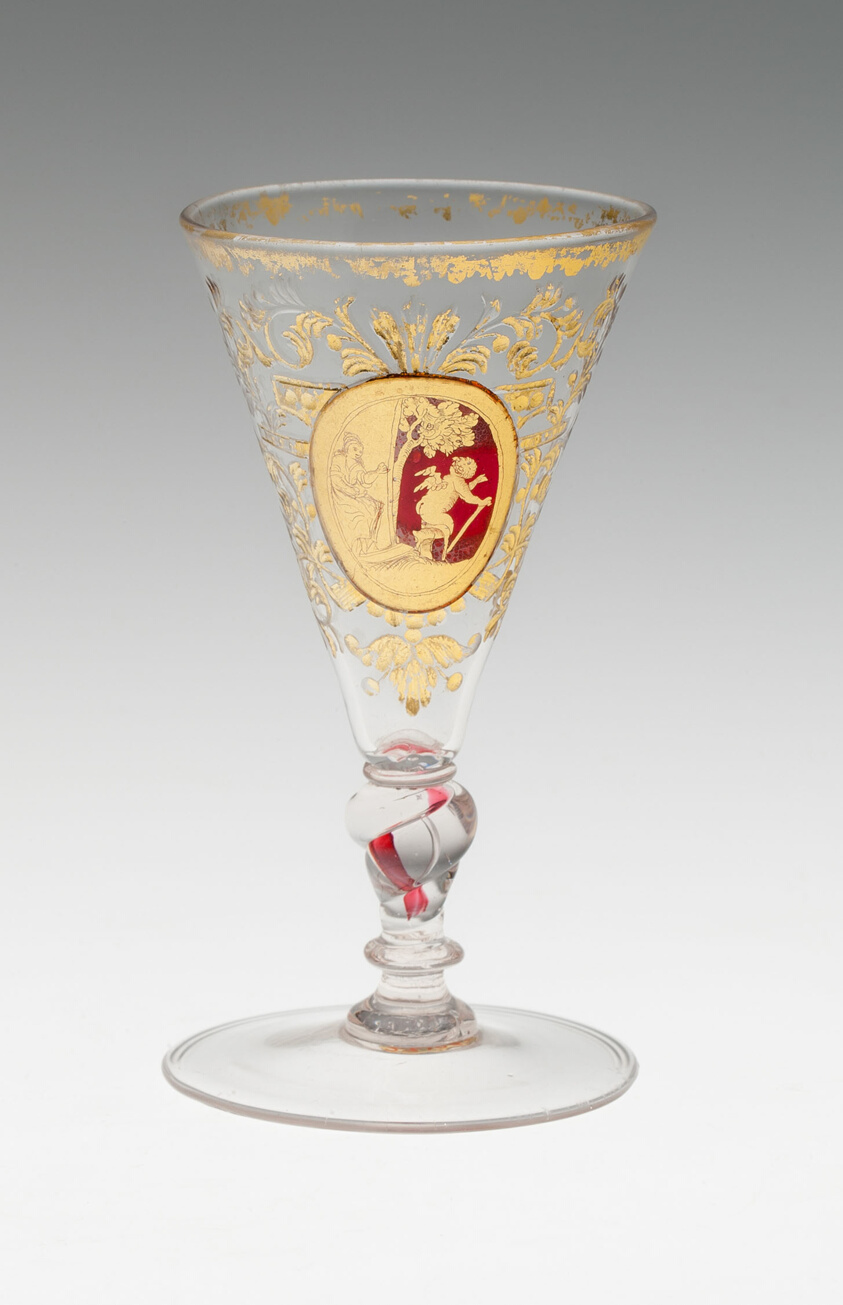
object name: Glass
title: Wine Glass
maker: Bohemia, Czech Republic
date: c. 1730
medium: Glass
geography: Bohemia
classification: drinking vessel; glass; european decorative arts